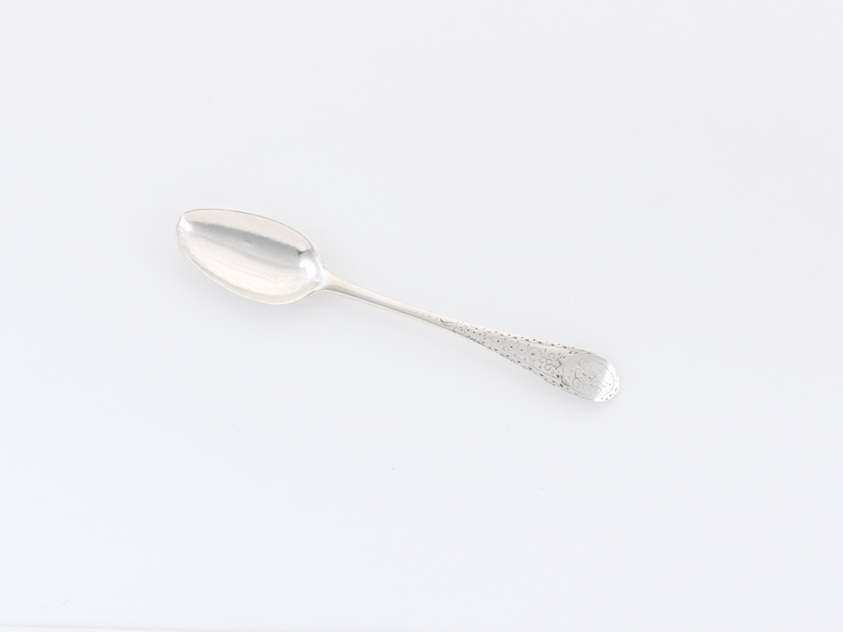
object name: Metalwork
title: Pair of Coffee Spoons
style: 18th Century, 19th century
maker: Artist unknown (American, 18th–19th century)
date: 1790–1812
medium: Silver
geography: United States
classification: spoon; silver; utensil; american decorative arts; american arts; decorative arts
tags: spoon, eating, dining